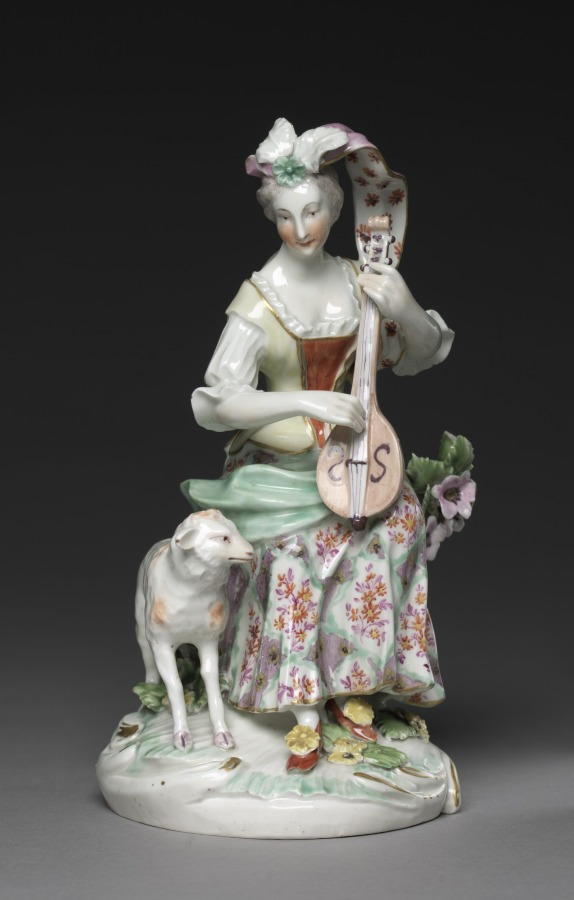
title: Seated Musicians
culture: England, Derby, 18th century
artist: Derby Porcelain Factory (British)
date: c. 1765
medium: soft-paste porcelain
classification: Ceramic